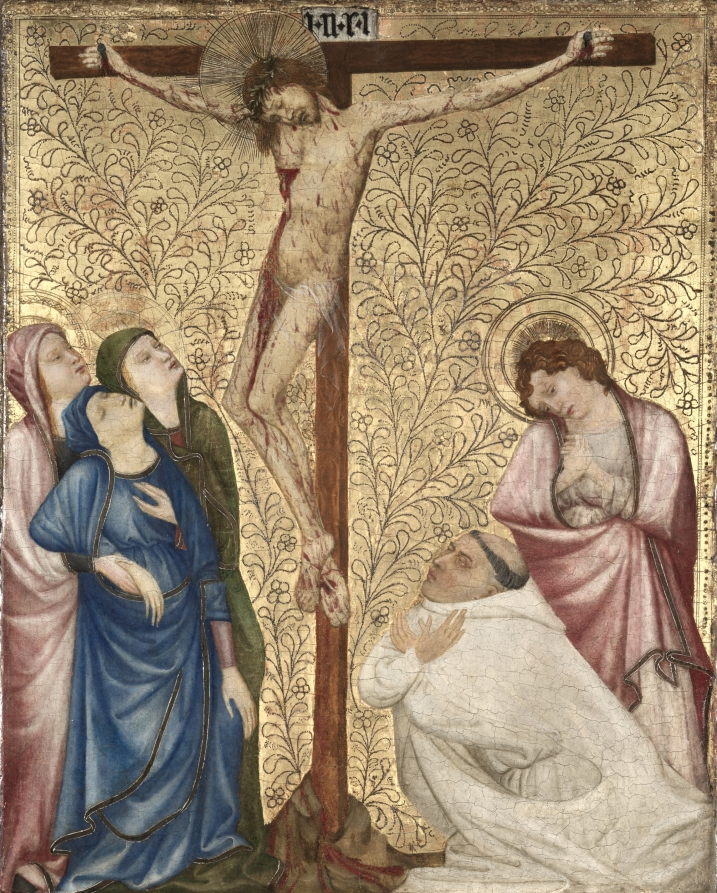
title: Calvary with a Carthusian Monk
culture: France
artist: Jean de Beaumetz (French, c. 1335–1396)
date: 1389–95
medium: oil on oak panel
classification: Painting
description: Jean de Beaumetz became the official court painter to the Burgundian duke, Philip the Bold, in 1376. Between 1389 and 1395 he created devotional paintings for the monks’ cells at the Chartreuse de Champmol, the monastery founded by Philip and his wife Margaret to house the ducal tombs. This panel, originally one of 26, is only one of two that have survived; the second is preserved in the Louvre in Paris. The Carthusians were intensely devoted to the Passion of Christ; particularly bloody images of the Crucifixion often decorated their cells. Isolated from one another, the monks contemplated the sacrifice of Christ (emphasized here by the presence of a Carthusian monk at the foot of the cross) creating an empathetic connection with the suffering of the Virgin who faints in the arms of the two Marys. Saint John the Evangelist, on the right, bows his head in sorrow. The punched decoration in the gold background represents the Trees of Life and Knowledge, emphasizing the biblical connection between Adam and Christ.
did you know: Records exist detailing the delivery of the this panel and 25 others to the monastery Chartreuse de Champmol, for use in the monks' cells.